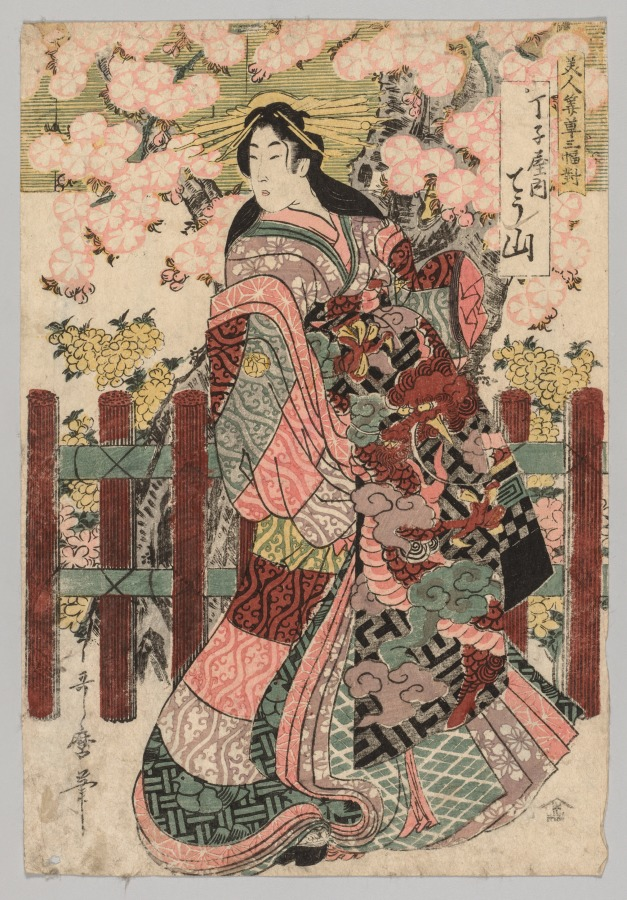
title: Chōzan of Chōjiya from the series Triptych of Beauties Before Blinds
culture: Japan, Edo period (1615–1868)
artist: Kitagawa Utamaro (Japanese, c. 1754–1806)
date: 1753–1806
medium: color woodblock print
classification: Print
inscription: Signature: Utamaro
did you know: The yellow title cartouche at the upper right of this print lets us know it was part of a triptych.